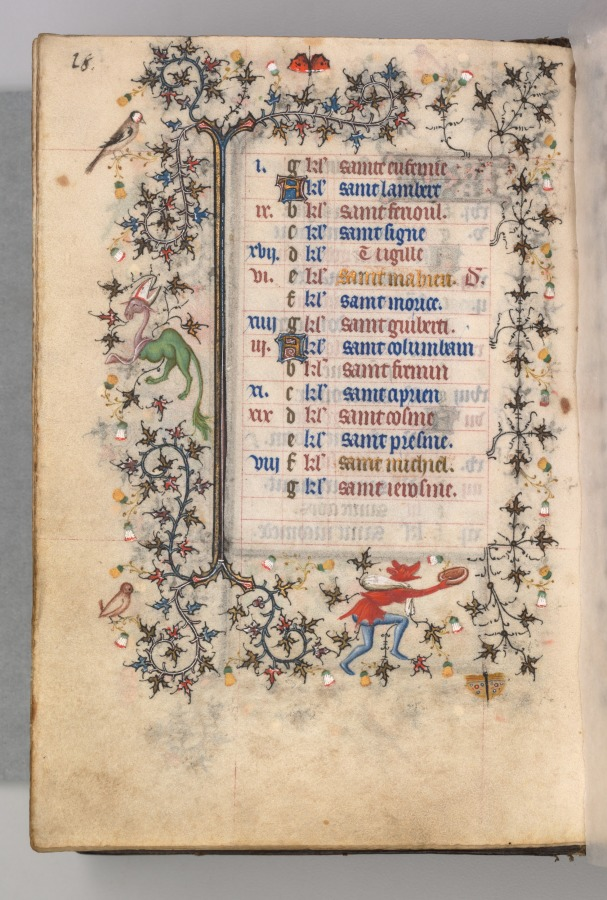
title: Hours of Charles the Noble, King of Navarre (1361-1425): fol. 9v, September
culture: France, Paris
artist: Master of the Brussels Initials and Associates (French)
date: c. 1405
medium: ink, tempera, and gold on vellum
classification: Bound Volume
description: This precious volume was obviously highly prized by its owner, the French-born King of Navarre, who had his coat of arms painted on no less than twenty folios. Rather than directly commissioning this manuscript from a specific workshop, it seems that Charles the Noble acquired his book of hours -- perhaps ready-made for the luxury market -- while on a trip to Paris in 1404-05. A collaborative effort, six painting styles are evidenced within the pages of this codex, those of two Italians, two Frenchmen, and two Netherlanders. The painter who was responsible for the planning and decoration of the book, and who produced seventeen of the large miniatures, was a Bolognese artist known as the Master of the Brussels Initials. His principal assistant, responsible for most of the borders, was a Florentine who signed his name "Zecho" da Firenze on folio 208 verso.